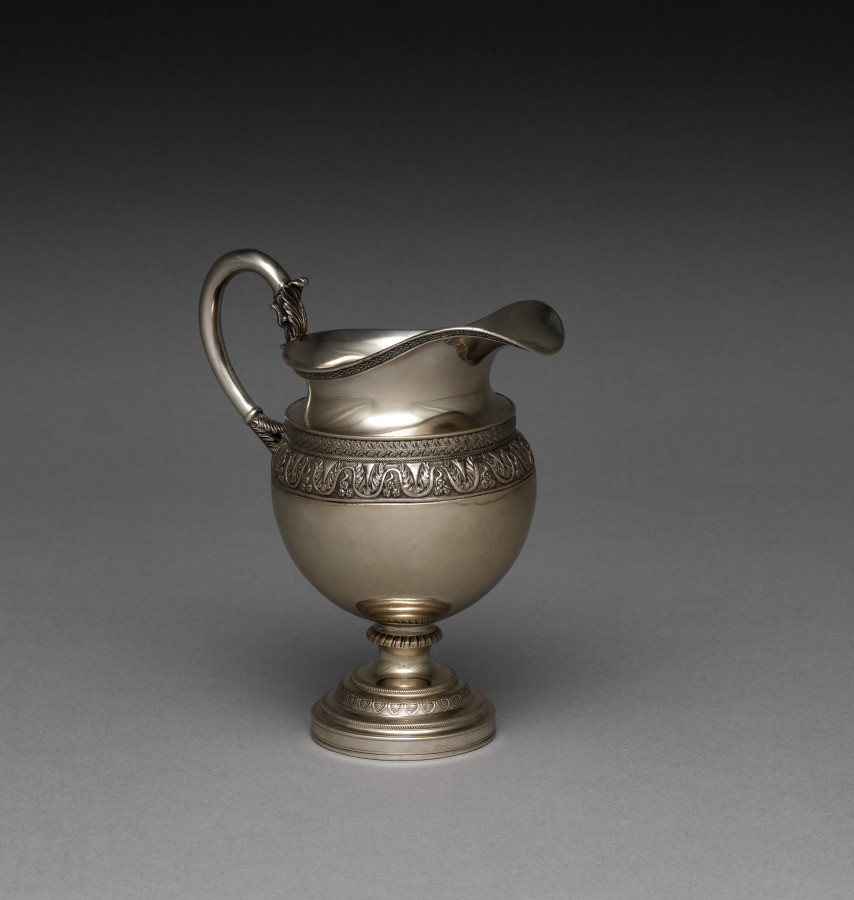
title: Cream Jug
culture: America, Pennsylvania, Philadelphia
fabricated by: Harvey Lewis (American, 1835)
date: c. 1811–25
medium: silver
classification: Silver